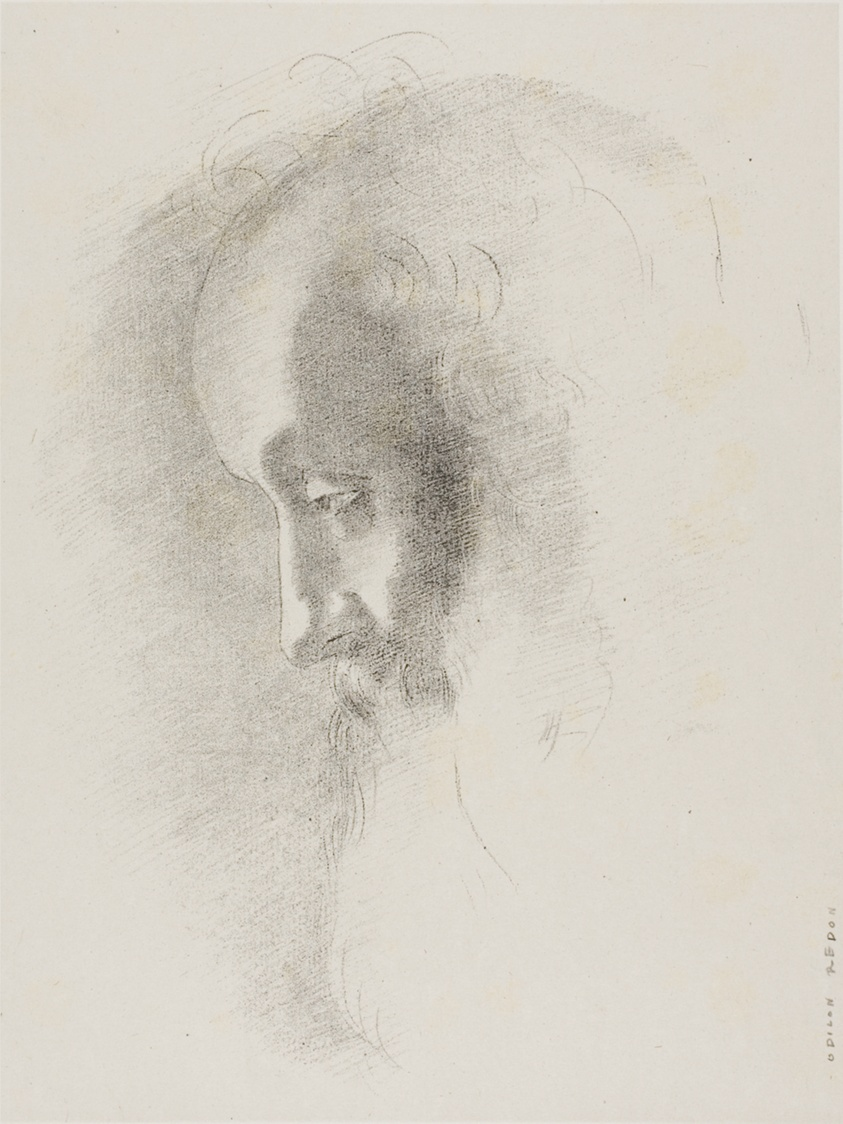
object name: Print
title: To Old Age, plate 1 of 6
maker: Odilon Redon (French, 1840-1916)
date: 1886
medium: Lithograph in black on light gray China paper laid down on white wove paper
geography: France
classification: lithograph; print; prints and drawing; paper